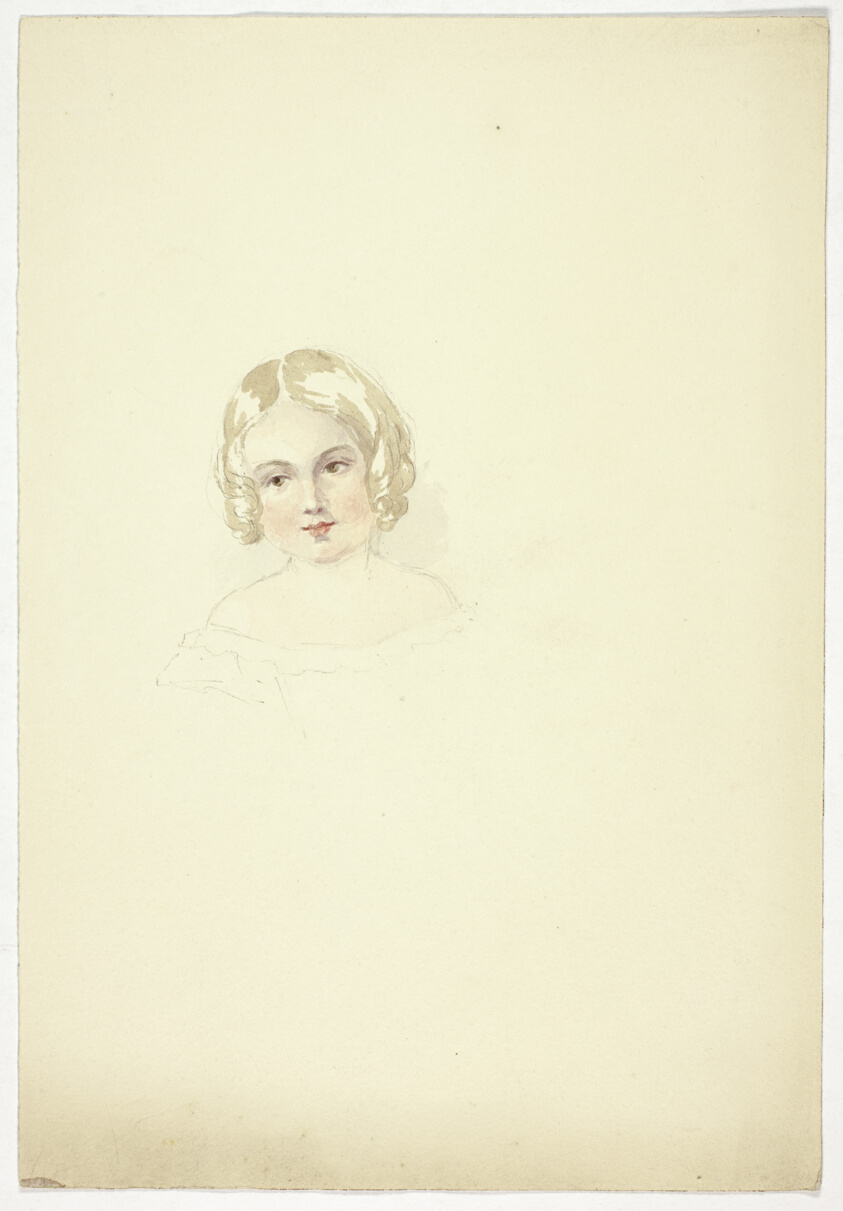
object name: Drawing and Watercolor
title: Portrait Head of a Young Girl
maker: Elizabeth Murray (English, c. 1815-1882)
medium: Watercolor over graphite on cream wove paper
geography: England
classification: watercolor; drawings (visual works); prints and drawing